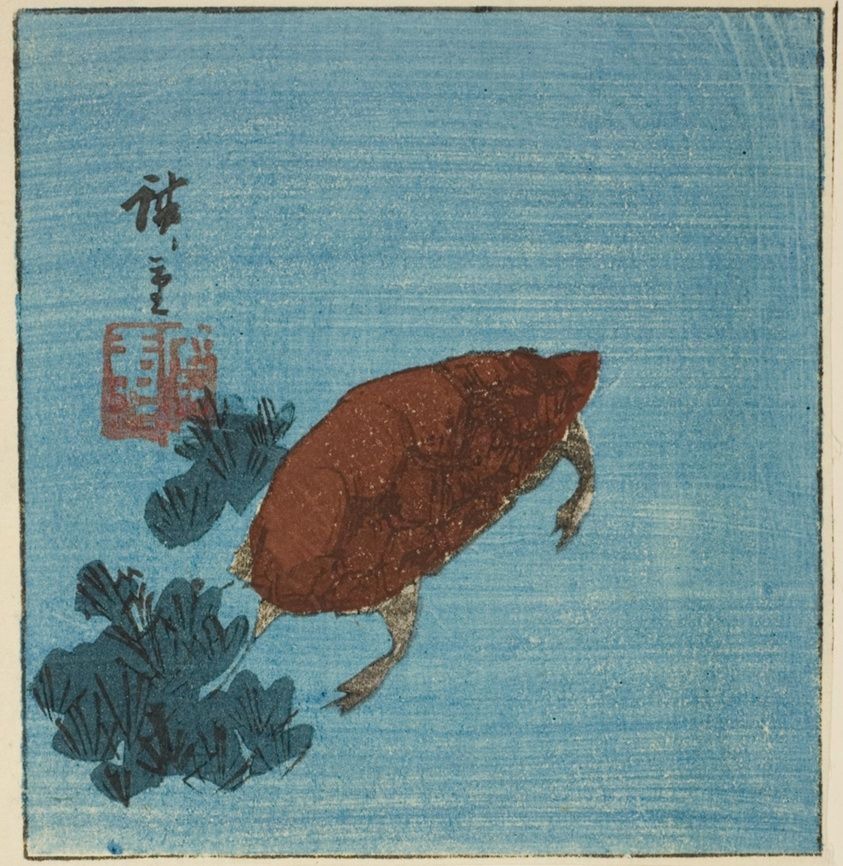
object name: Print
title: Turtle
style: Japanese (culture or style)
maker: Utagawa Hiroshige 歌川 広重; Japanese, 1797-1858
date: c. 1840s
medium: Color woodblock print; section of harimaze sheet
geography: Japan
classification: woodblock print; print; asian art